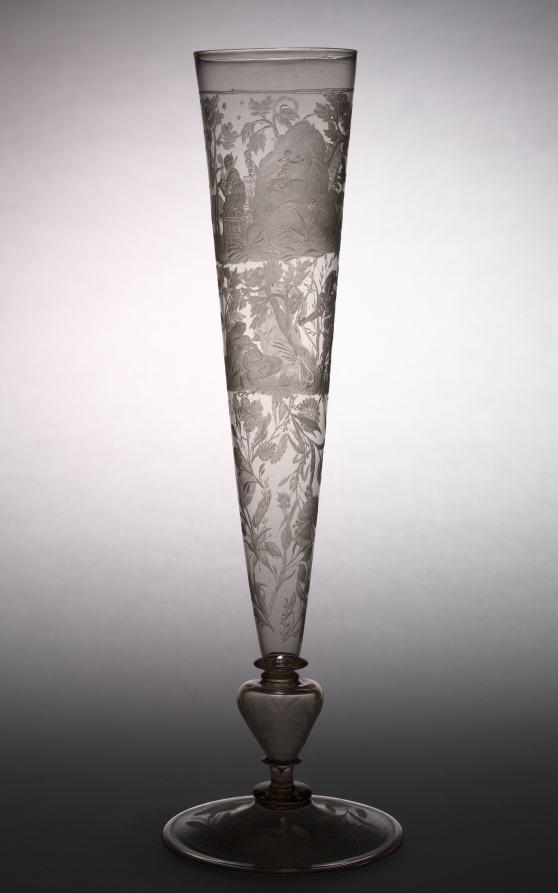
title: Flute Glass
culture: Germany, Thuringia, early 17th century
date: early 1600s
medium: glass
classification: Glass